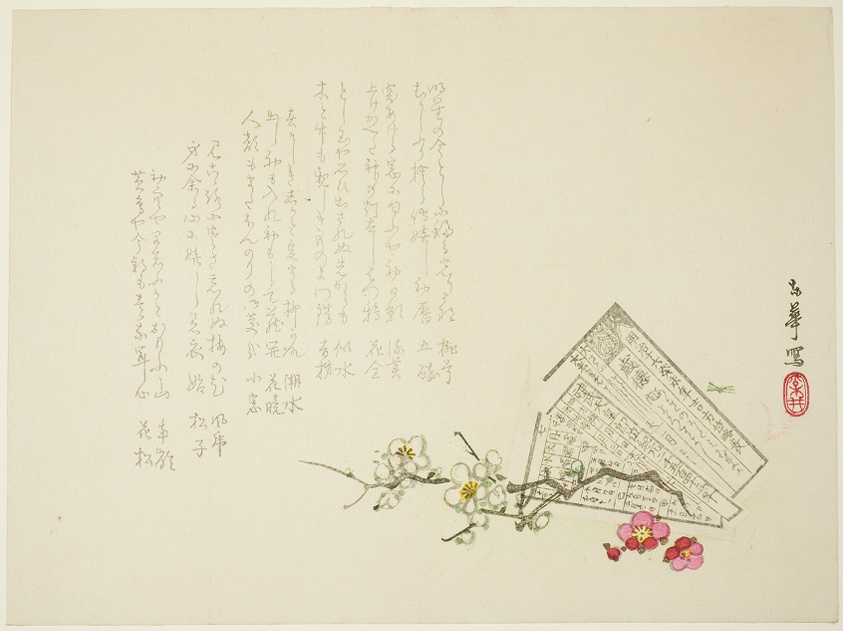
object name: Print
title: Almanac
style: Japanese (culture or style)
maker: Matsui Toka (Japanese, 19th century)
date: 1883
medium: Color woodblock print; surimono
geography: Japan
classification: woodblock print; print; asian art